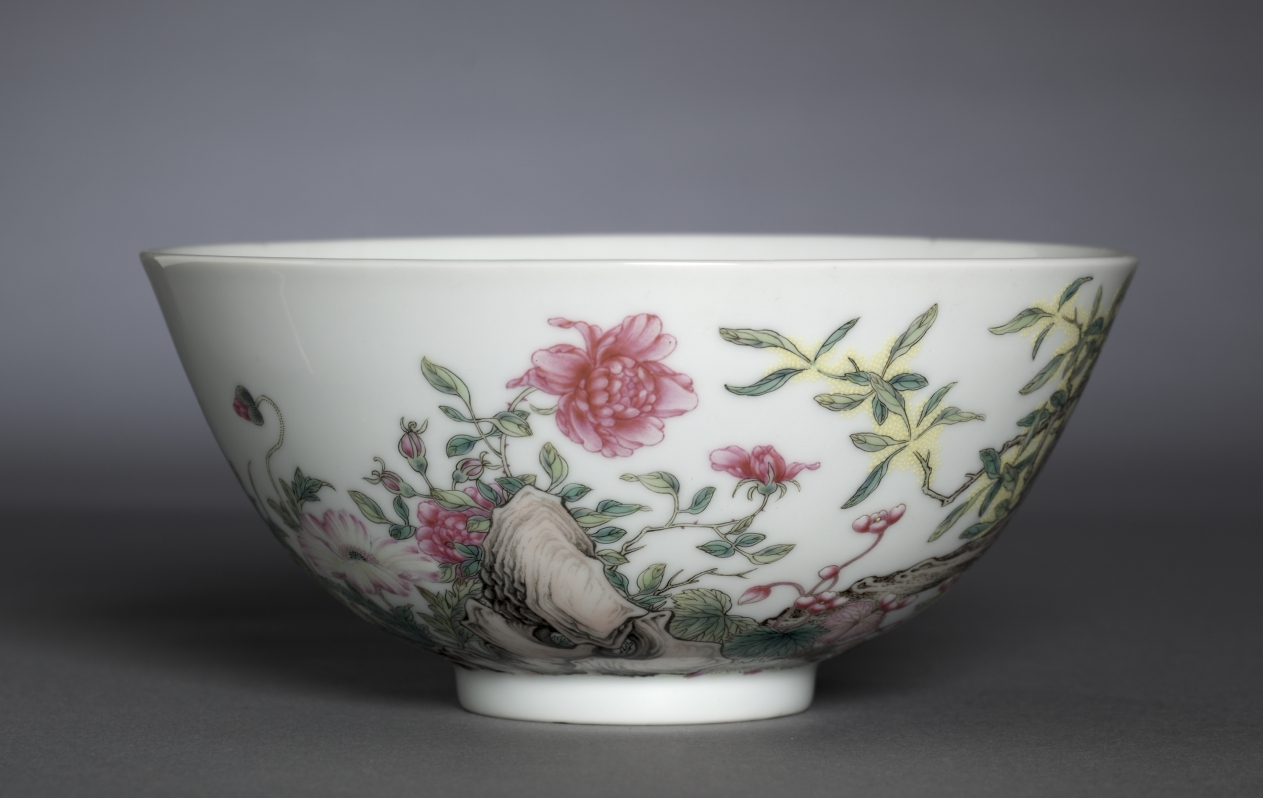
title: Bowl with Poppies, Tree Peony, and Flowering Mimosa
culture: China, Jiangxi province, Jingdezhen, Qing dynasty (1644-1911), Yongzheng mark and reign (1723-1735)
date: 1723–35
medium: porcelain with overglaze enamel decoration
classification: Ceramic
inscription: 大清雍正年制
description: Developments in enamel technology led to new possibilities in polychrome decoration. Pinks appeared, lending their name to the new palette of overglaze colors (famille rose), and the addition of opaque white allowed painters to vary the value of pigments, enhancing the painterly quality of porcelain decoration. As on painted scrolls and album leaves, the image is accompanied with a poem, in this case: "Branches come alive in the moonlight; Blossoms fill the autumn realms."